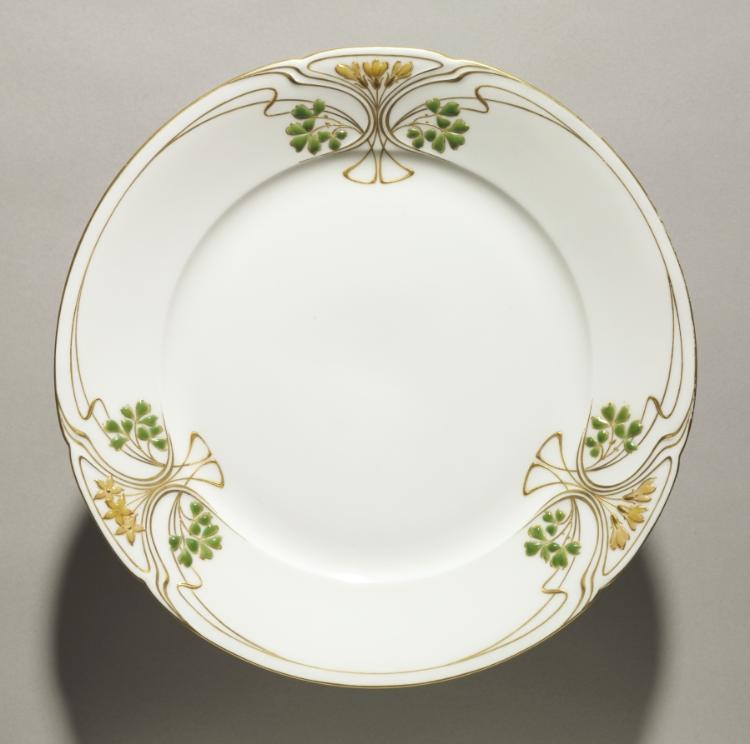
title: Plate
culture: Germany, 20th century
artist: KPM (Königliche Porzellan-Manufaktur) (German, Berlin, est. 1763)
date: 1901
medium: porcelain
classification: Ceramic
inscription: KMP" and a globe with a cross over it in red fired on overglaze enamel inside the support ring on the base.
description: Manufactured by the Royal Porcelain Factory in Berlin, this plate is decorated with elegant gilding around the perimeter and yellow flowers with green leaves.